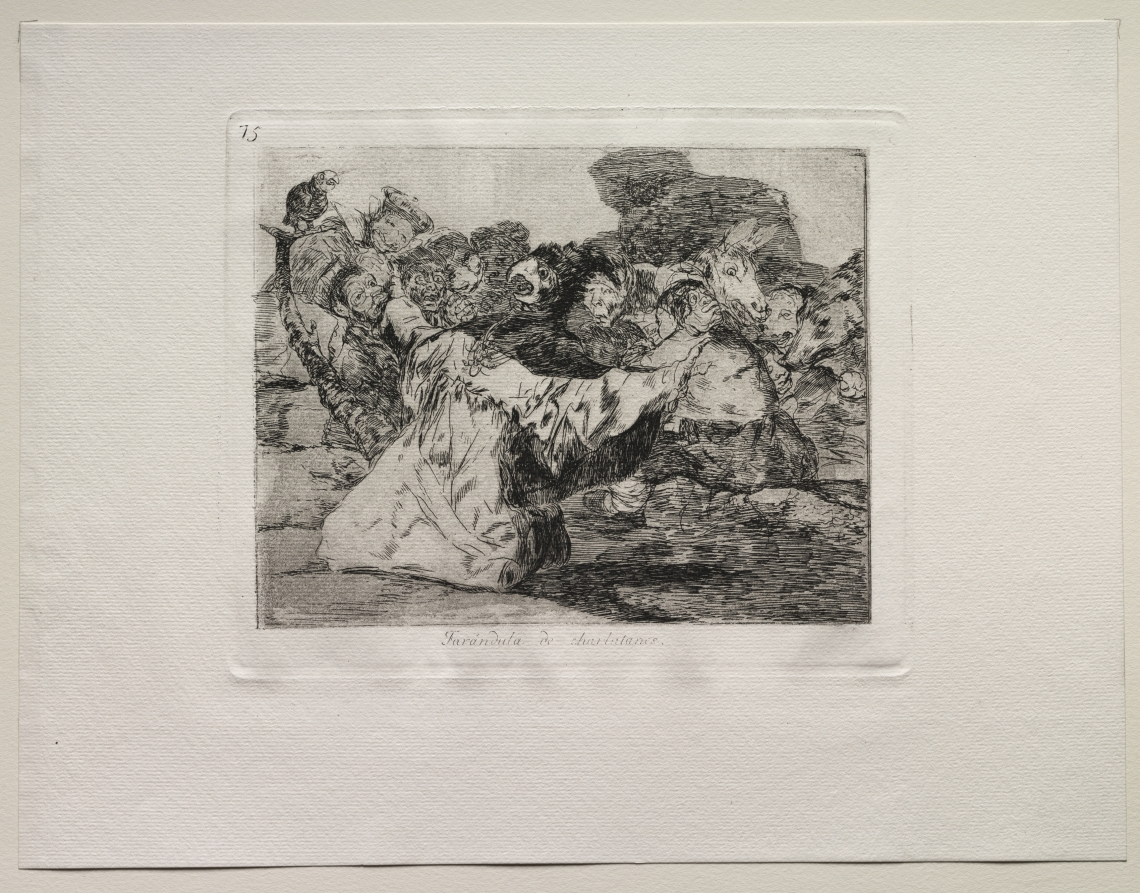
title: The Horrors of War: Charlatan's Show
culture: Spain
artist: Francisco de Goya (Spanish, 1746–1828)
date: c. 1810–20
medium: etching and aquatint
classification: Print